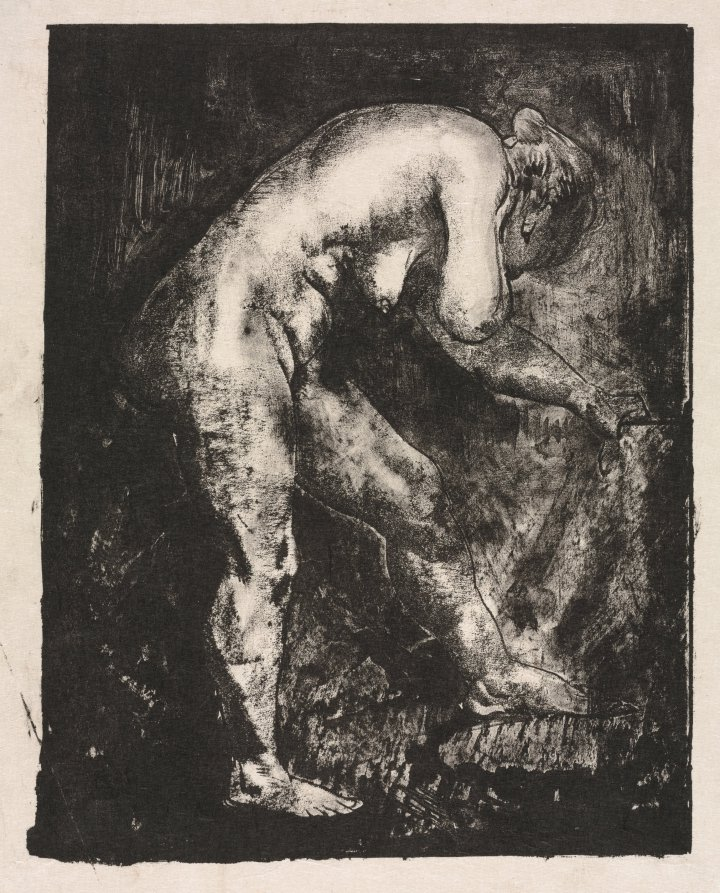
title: Standing Nude Bending Forward, third state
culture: America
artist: George Bellows (American, 1882–1925)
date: 1916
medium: lithograph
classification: Print